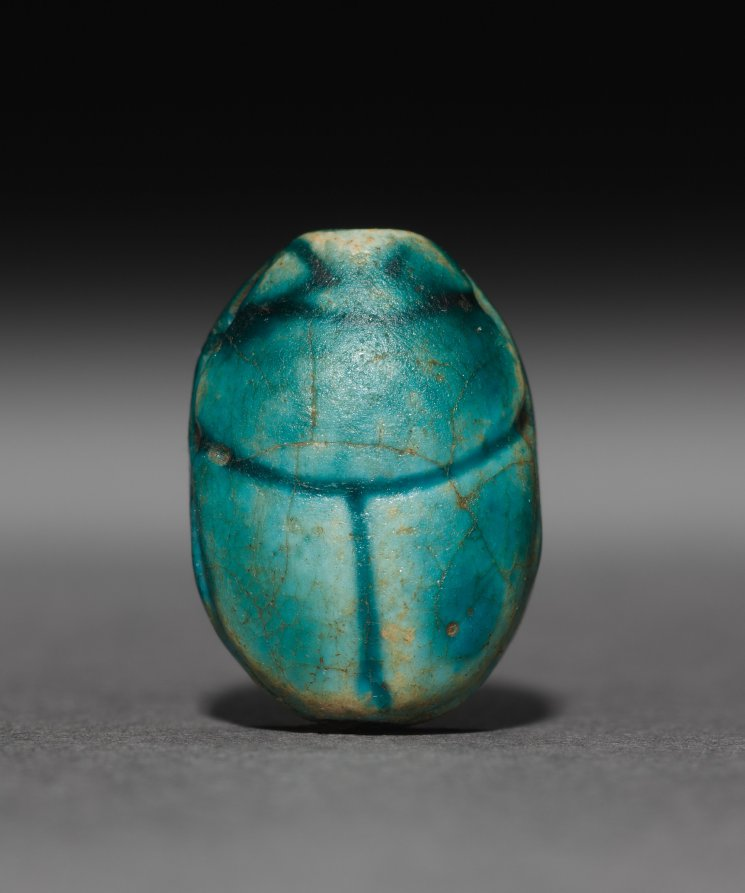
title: Scarab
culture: Egypt, Modern forgery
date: 1900–1914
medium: blue-glazed steatite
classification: Scarabs